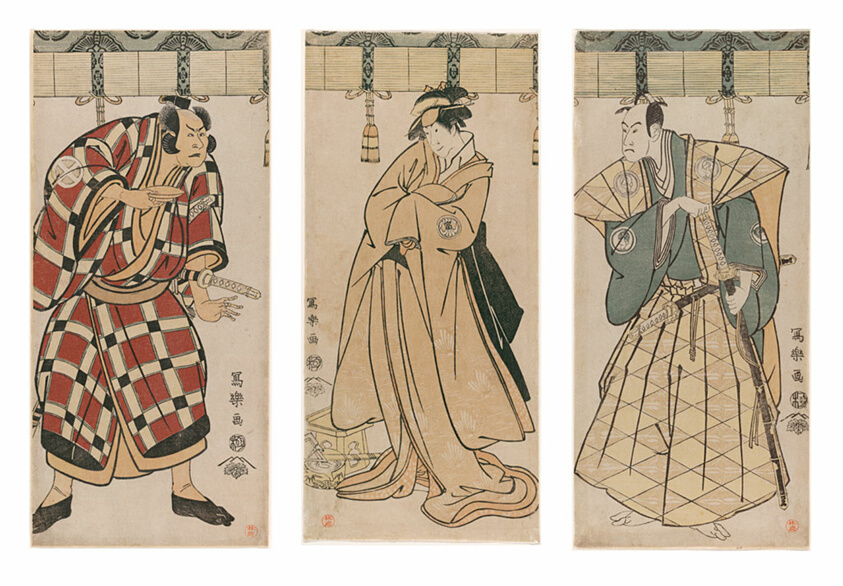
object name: Print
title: The actor Otani Hiroji III as Hata no Taizan Taketora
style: Japanese (culture or style)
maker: Toshusai Sharaku 東洲斎 写楽; Japanese, active 1794-95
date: 1794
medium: Color woodblock print; left sheet of hosoban triptych (right: 1928.1061, center: 1928.1062)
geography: Japan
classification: woodblock print; hosoban print; triptych; print